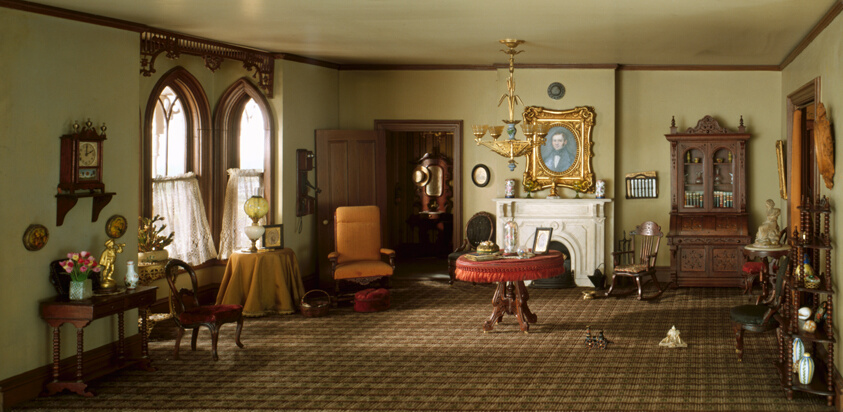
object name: Miniature room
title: A33: "Middletown" Parlor, 1875-90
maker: Designed by Narcissa Niblack Thorne; American, 1882-1966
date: c. 1940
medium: Miniature room, mixed media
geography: United States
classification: miniature; thorne rooms